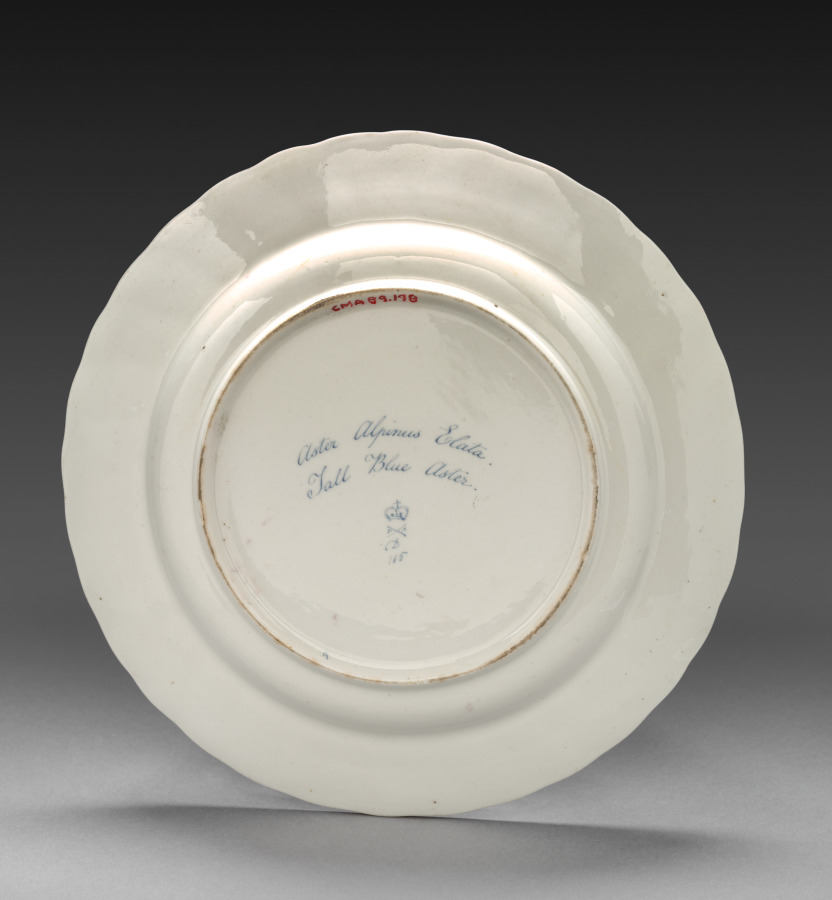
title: Plate from Dessert Service: Tall Blue Aster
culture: England, Derby, 18th century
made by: Derby (Crown Derby Period) (British)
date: c. 1800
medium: porcelain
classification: Ceramic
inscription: inscribed in blue on back: Aster Alpinus Elata/Tall Blue Aster./crown/crossed batons and dots/D/115. Near edge: 9.